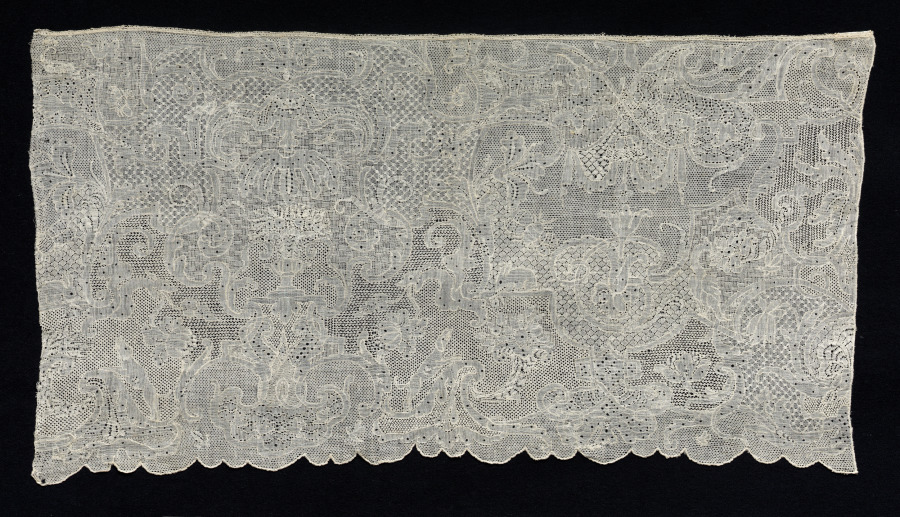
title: Lace Strip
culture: Netherlands or Flanders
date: 1700–1740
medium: Linen: needle lace (drawnwork) and embroidery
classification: Lace